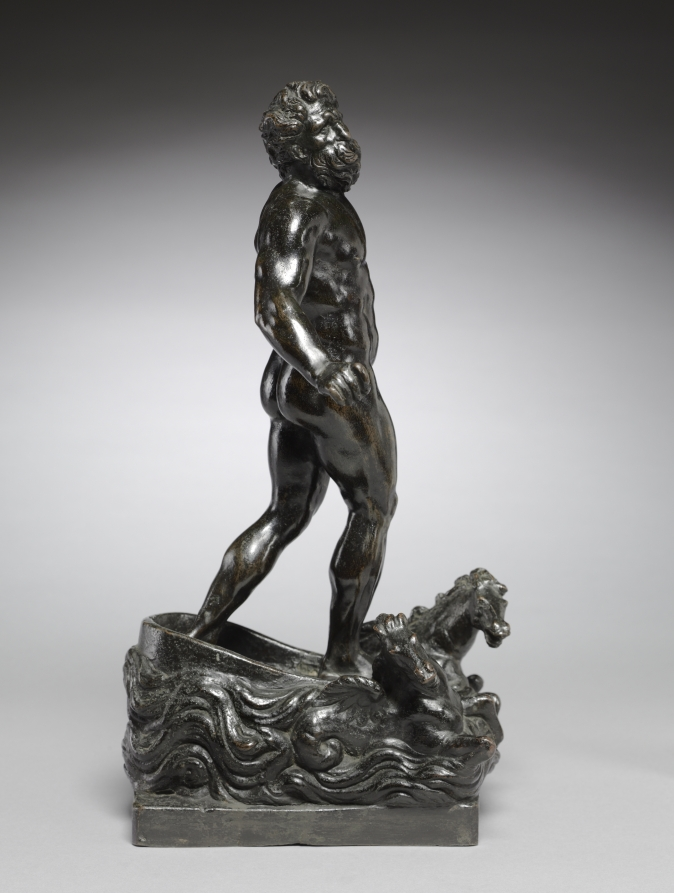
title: The Wrath of Neptune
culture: Italy, 16th century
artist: cast after a model by Tiziano Minio (Italian, 1511/12–1552)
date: late 1500s to early 1600s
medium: bronze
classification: Sculpture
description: In Roman mythology, Neptune (or Poseidon in Greek mythology) is the god of flowing water and is believed to protect against droughts. This small bronze is likely a sculptural representation of the Wrath of Neptune from the Aeneid. During the Trojan War, Juno incited winds to sink Trojan ships. Infuriated by Juno's incursion into his domain of the sea, Neptune rides out in his chariot, saving the Trojan army and threatening to punish the winds for their insolence. The massive, muscular nude male figure stands upright on his seahorse-drawn chariot, twisting to face the wind. The turbulent waves and the windblown hair and beard of the figure give life to this small bronze. The figure's left hand would have originally held reins, while the right hand, which once held a trident, is outstretched in the act of commanding the waves to be still. This bronze was once attributed by art historian Wilhelm von Bode to Jacopo Sansovino based on its similarity to known works, such as the over-life-size marble figure of Neptune of the Scala di Giganti outside of the Doge's Palace in Venice. However, by 1921 Leo Planiscig had noted the CMA Neptune's similarity to bronzes and reliefs by Sansovino's pupil, Tiziano Minio, in the Loggetta at San Marco Square, Venice. In Minio's Jupiter on the Island of Candia for the Loggetta, the waves are represented with the same incised, undulating grooves as in this work. Neptune possesses the same stocky proportions and heavy musculature which was characteristic of Minio. The high polish and sweeping contours of the figure are characteristic of Sansovino, but the heightened drama of the subject display Minio's stylistic advancement from his teacher.